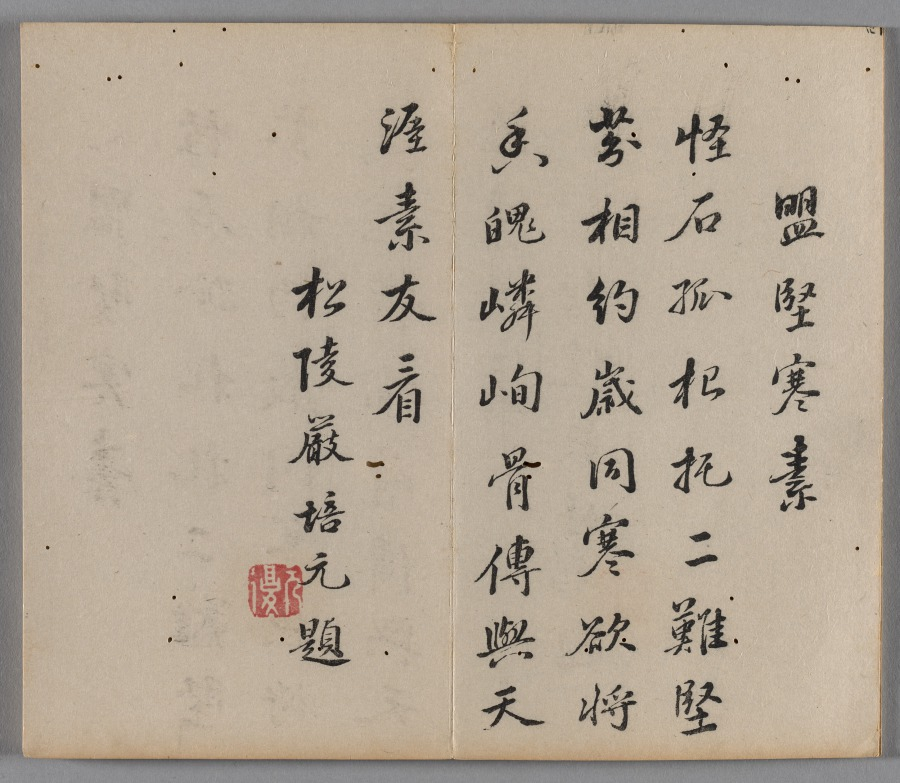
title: Ten Bamboo Studio Painting and Calligraphy Handbook (Shizhuzhai shuhua pu): Plum Blossoms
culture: China, Qing dynasty (1644-1911)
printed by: Hu Zhengyan (Chinese, c. 1584–1674)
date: 1633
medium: Woodblock-printed book; ink and colors on paper; first edition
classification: Print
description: Color printing reached a level of perfection in the early 1600s, as seen in this Ten Bamboo Studio Collection of Calligraphy and Painting and the Mustard Seed Garden Manual of Painting (printed 1679 and 1701). The painterly quality, precision in registering (aligning) the woodblocks, and harmonious colors made them the most successful color print editions in Chinese history. Both editions were printed and compiled in Nanjing, spread nationwide, and had a great impact on the arts in Japan and Korea.